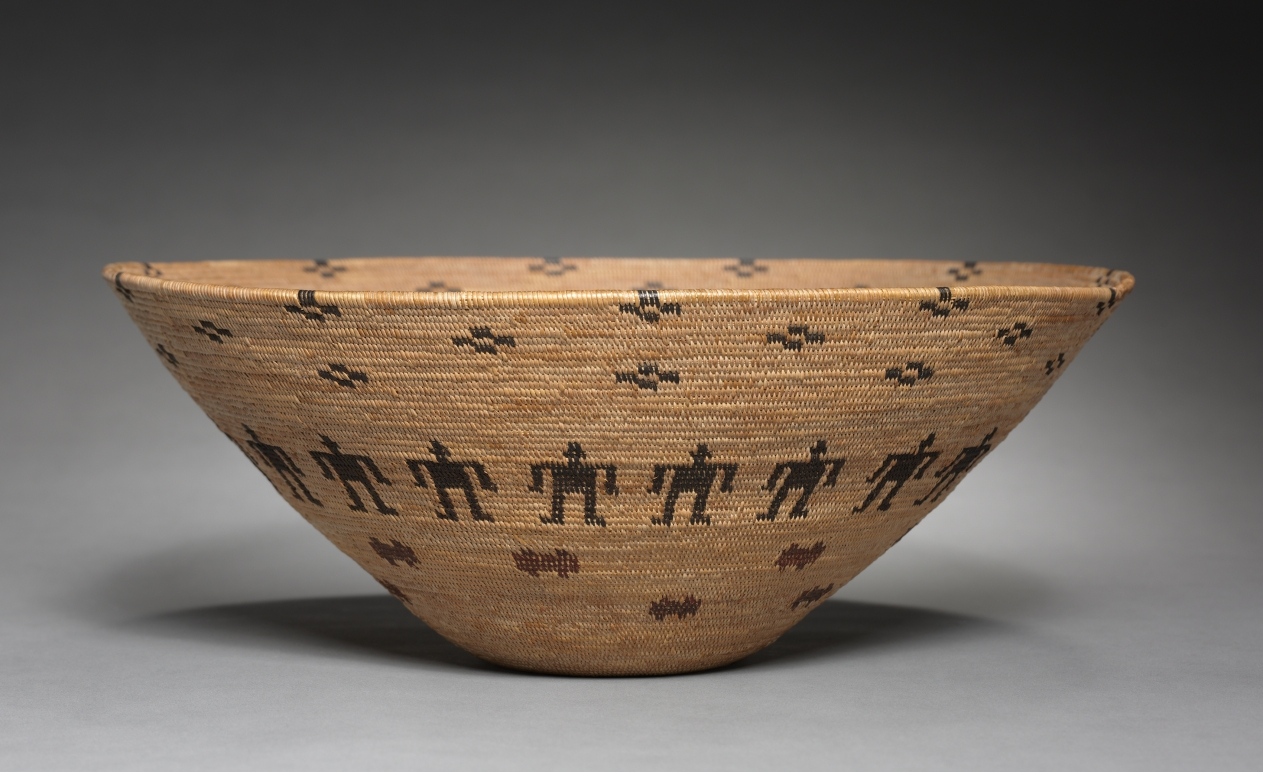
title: Bowl Basket (Unfinished)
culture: California, Yokuts, late 19th- early 20th century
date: 1895–1900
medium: Redbud, sedge, bracken fern; coiled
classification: Basketry